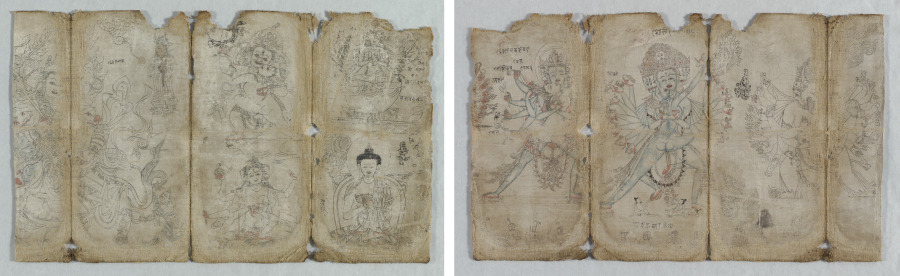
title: Iconographic Sketchbook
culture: Tibet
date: c. 1500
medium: ink and watercolor on cotton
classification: Drawing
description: These rare surviving pages of a practice book have drawings of prominent tantric figures. The line drawing is confident and masterful, with each iconographic element rendered with clarity and precision. The svelte proportions of the figures follow the style of the Khyenri school initiated in the second half of the 15th century by the artist Khyentse Wangchuk (about 1420-1500), known for his elegant and energetic depictions of the fierce manifestations of the enlightened beings.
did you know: Tibetan thangka painters referred to sketchbooks with drawings that delineate the iconographies—appearance and identifying attributes—of Buddhist figures.